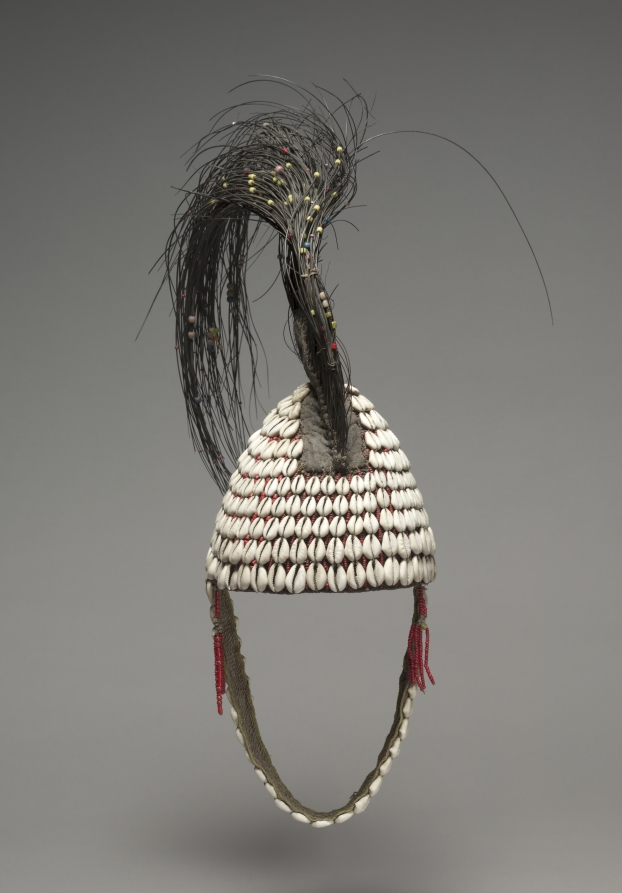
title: Bwami Prestige Cap (Mukuba or Nkumbu)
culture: Africa, Central Africa, Democratic Republic of Congo, Lega-style maker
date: early to mid-1900s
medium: Plant fibers, elephant rawhide and hair, cowrie shells, glass beads, and cord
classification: Garment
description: Hats of different types, sizes, and materials figure prominently in the Lega people’s Bwami association where they indicate status and rank. Cone-shaped hats made of canvas covered with cowrie shells and surmounted by an elephant tail are worn during initiations into kindi, the highest of the five male grades. This prestige cap uses a variety of local and imported materials to show its wearer's importance. The plant fibers that support the hat and the elephant hair were sourced in Central Africa, while the beads and cowrie shells were imported. The beads were made in Europe, while the cowrie shells came from the Indian Ocean region. The might of Bwami members is likened to the elephant’s potentially destructive strength.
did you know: While identified with Africa, cowrie shells were generally imported from the Indian Ocean region. After being collected near the Maldives islands, these Indo-Pacific shells entered parts of Africa via overseas trade routes.